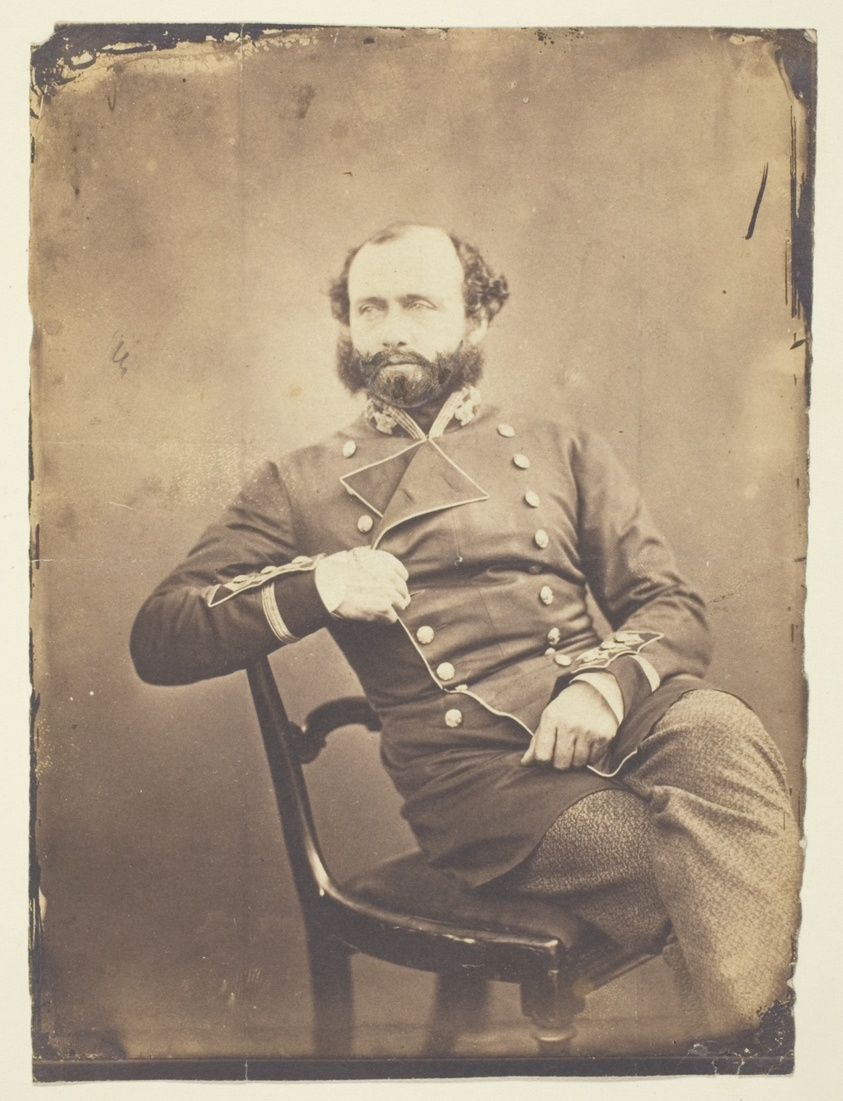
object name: Photograph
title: Sir Charles Ash Windham (1810-1970), General; taken at the Crimea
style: 19th century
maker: Roger Fenton (English, 1819–1869)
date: 1855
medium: Thinly albumenized print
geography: England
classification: albumen silver print; photographic process; photography; photograph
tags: Collected by Hugh Edwards